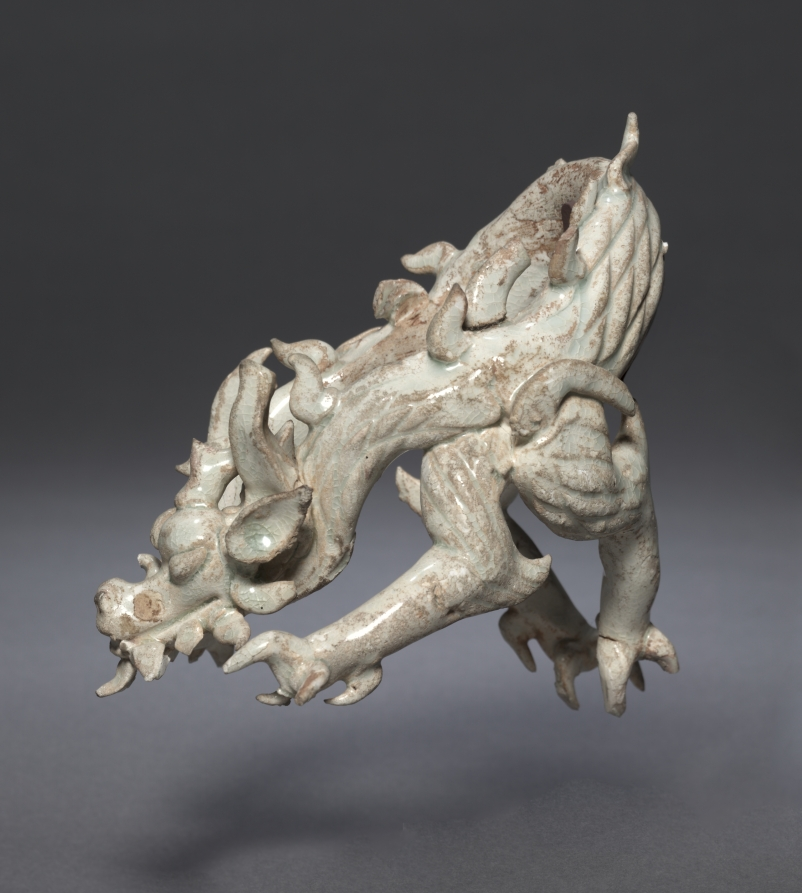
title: Dragon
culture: China, Southern Song Dynasty (1127-1279) - Yuan Dynasty (1271-1368)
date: 1127–1368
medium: glazed porcelain, qingbai ("blue-white") ware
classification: Ceramic